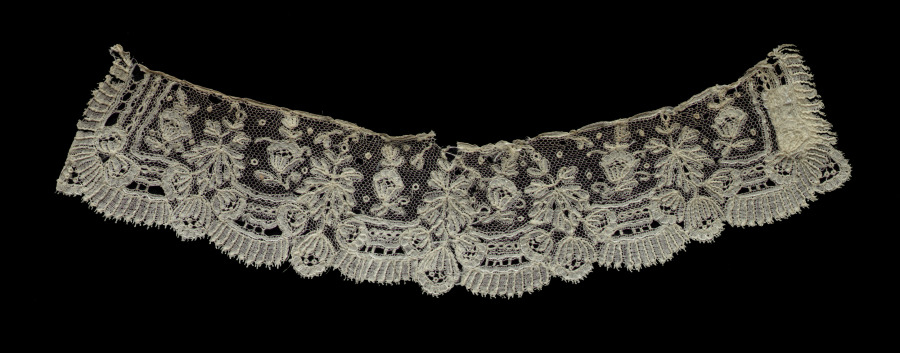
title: Lace Cuff (one of a pair)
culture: Probably Belgium, Brussels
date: early 1800s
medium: Bobbin lace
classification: Lace